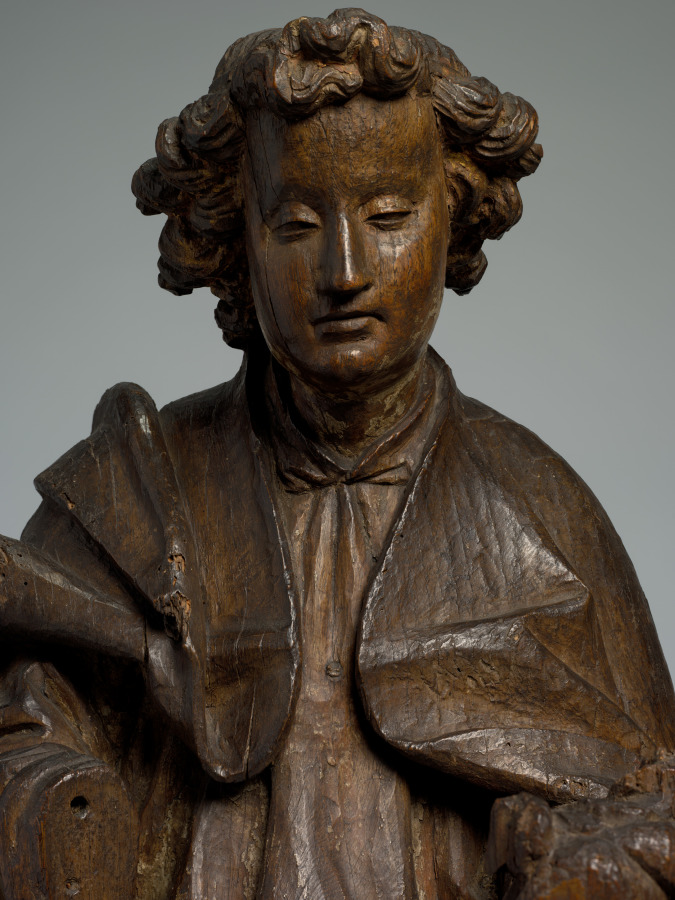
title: Angel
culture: Bruges?, Belgium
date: c. 1430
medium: oak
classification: Sculpture